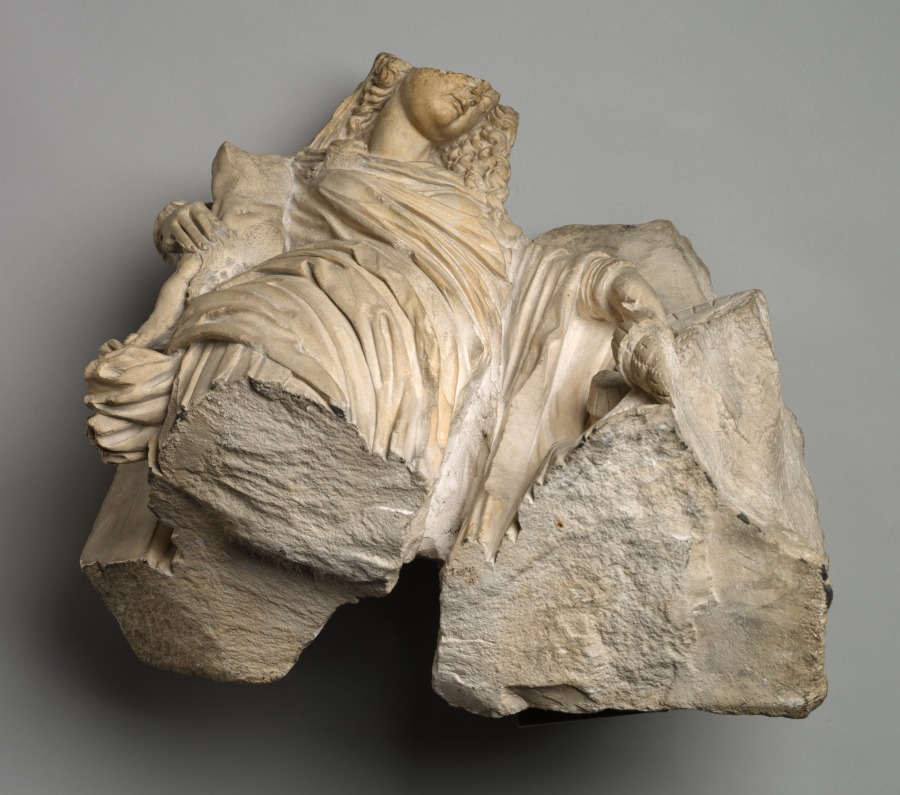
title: Fragment of a Female Figure with Child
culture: France, School of Troyes, 16th century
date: early 1500s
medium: stone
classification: Sculpture